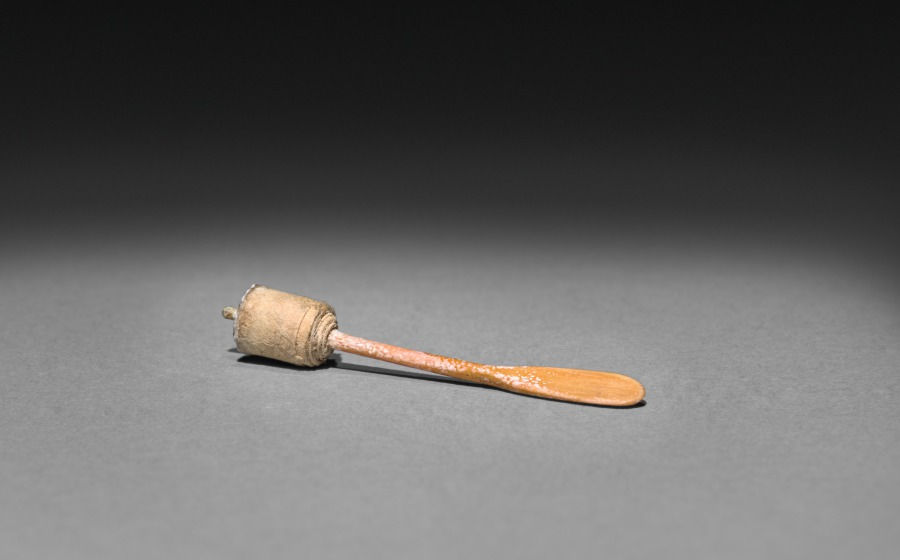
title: Snuff Bottle (stopper)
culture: China, Qing dynasty (1644-1911)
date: 1644–1911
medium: glass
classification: Glass